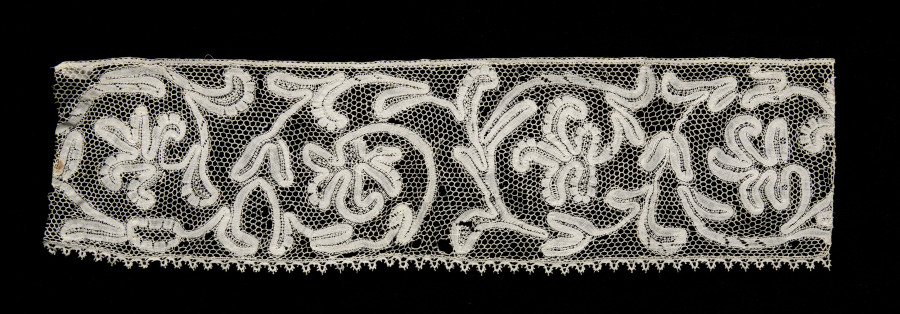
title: Lace Edging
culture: Italy, Milan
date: 1600s–1700s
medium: Bobbin lace (Punto di Milano)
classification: Lace